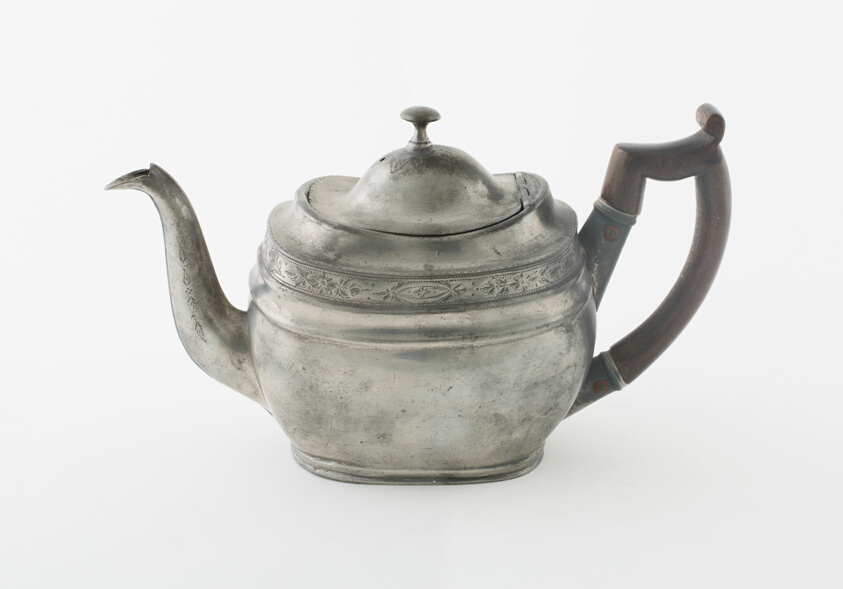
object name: Metalwork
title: Teapot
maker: Birch and Villers (John Birch and William Villers); England, active c. 1775-1820; Birmingham, England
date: c. 1820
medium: Pewter (Britannia metal) and wood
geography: Birmingham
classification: teapot; pewter; metalwork; european decorative arts